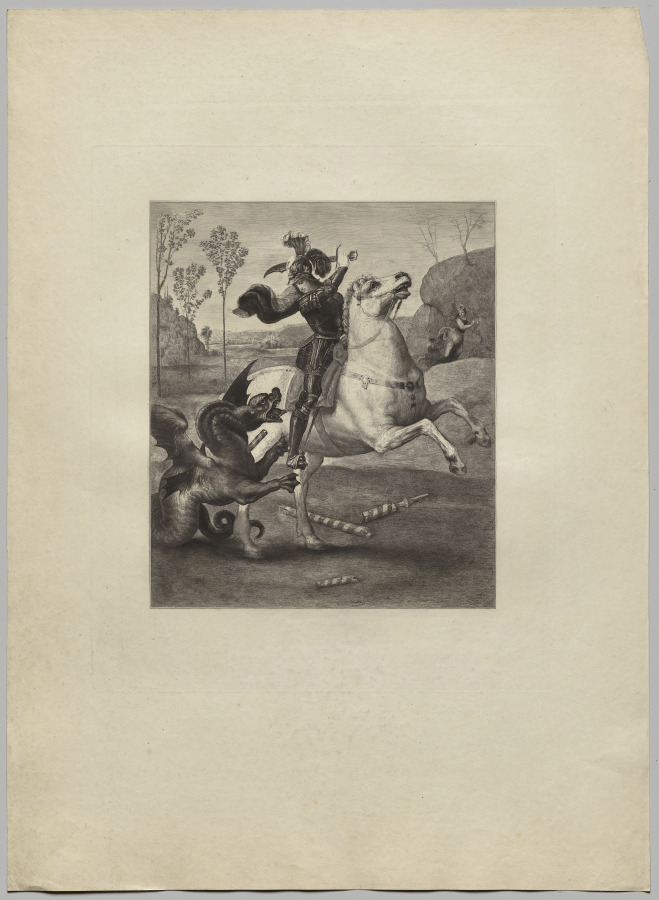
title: St. George and the Dragon (4)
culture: France, 19th century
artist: Claude-Ferdinand Gaillard (French, 1834–1887)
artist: after Raphael (Italian, 1483–1520)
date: 1885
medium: engraving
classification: Print